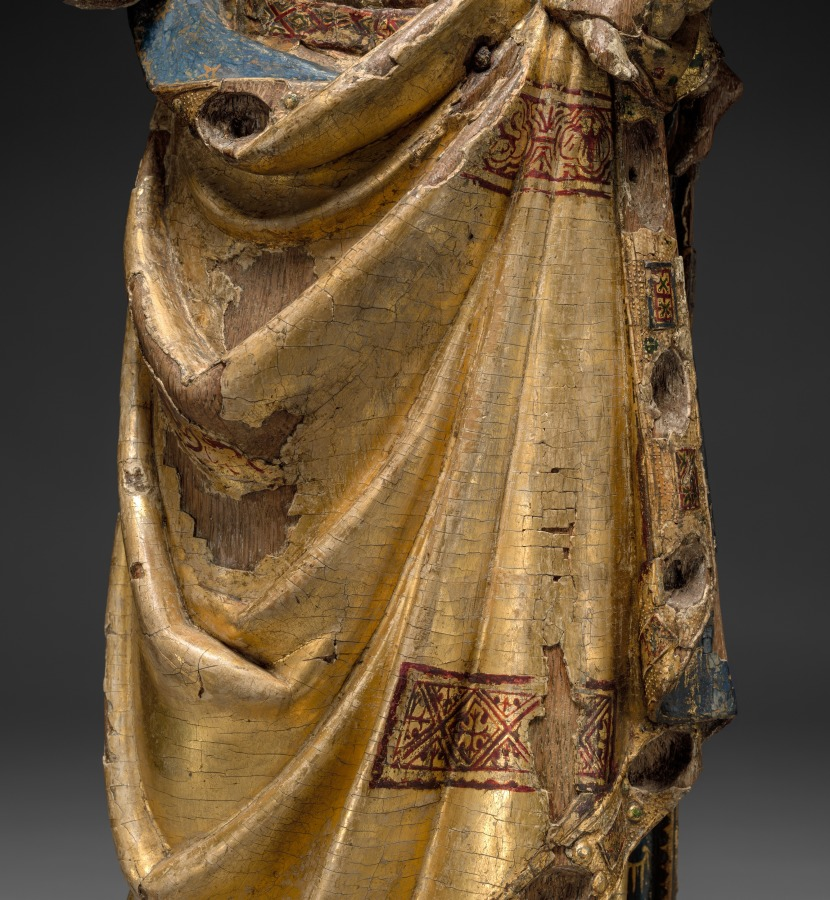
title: Virgin and Child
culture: Mosan (Valley of the Meuse), Liège(?), late 13th century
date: late 1200s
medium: wood (oak) with polychromy and gilding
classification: Sculpture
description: This sculpture is a rare survival in wood from the valley of the Meuse River (modern Belgium and Holland), an important region for the production of ecclesiastical art in the 1100s and 1200s. The elegantly draped figure is remarkable for the preservation of much of its original paint and gilding, including the Virgin's gilded mantle highlighted with decorative bands of geometric patterns and the green dragon on which she stands. There are small settings around the Virgin's neck and along the border of the mantle that would have originally been set with gem and glass cabochons in imitation of the richly adorned metalwork for which Mosan art was highly esteemed. The settings for these cabochons provide some hint of the original opulence of this sculpture. The Virgin's serene features and beautiful countenance are noteworthy, as is the refined execution of the draperies.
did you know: Dragons, like the one Mary is standing on, sometimes look more like snakes in medieval art.